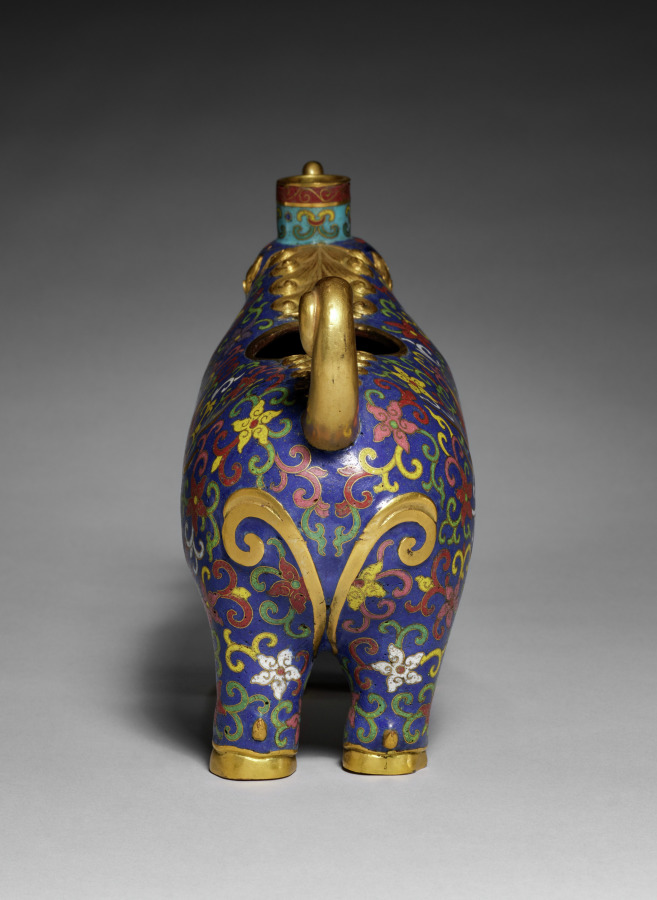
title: Container in the Form of a Unicorn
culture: China, Qing dynasty (1644-1911), Qianlong mark and reign (1736-95)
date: 1736–95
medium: cloisonné enamel and gilt copper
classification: Enamel